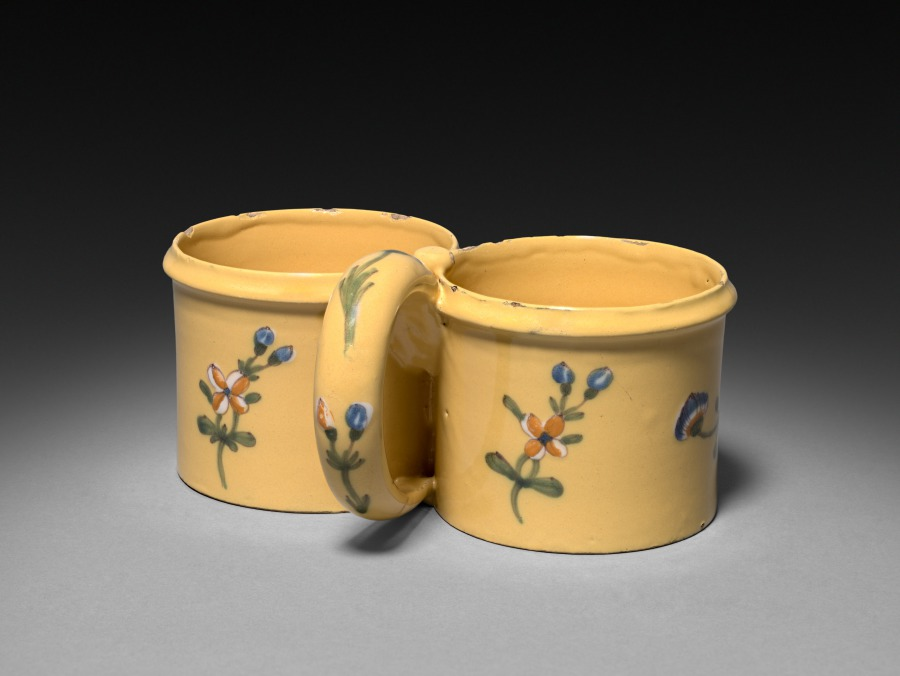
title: Cruet Stand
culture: Southern France, late 18th - early 19th century ?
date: c. 1790 – 1810 ?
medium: faience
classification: Ceramic